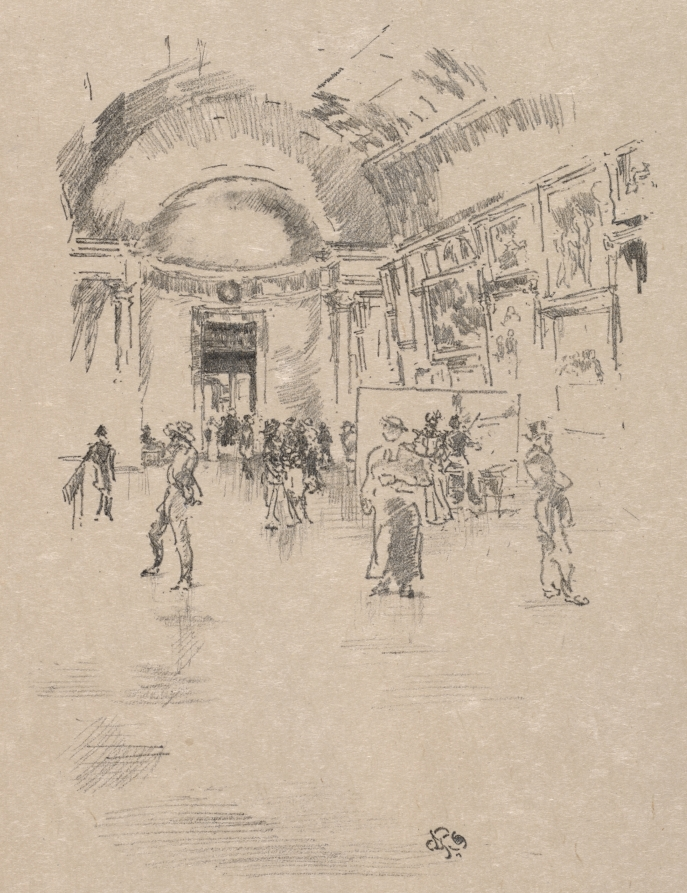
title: The Long Gallery, Louvre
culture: America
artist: James McNeill Whistler (American, 1834–1903)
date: 1894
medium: lithograph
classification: Print